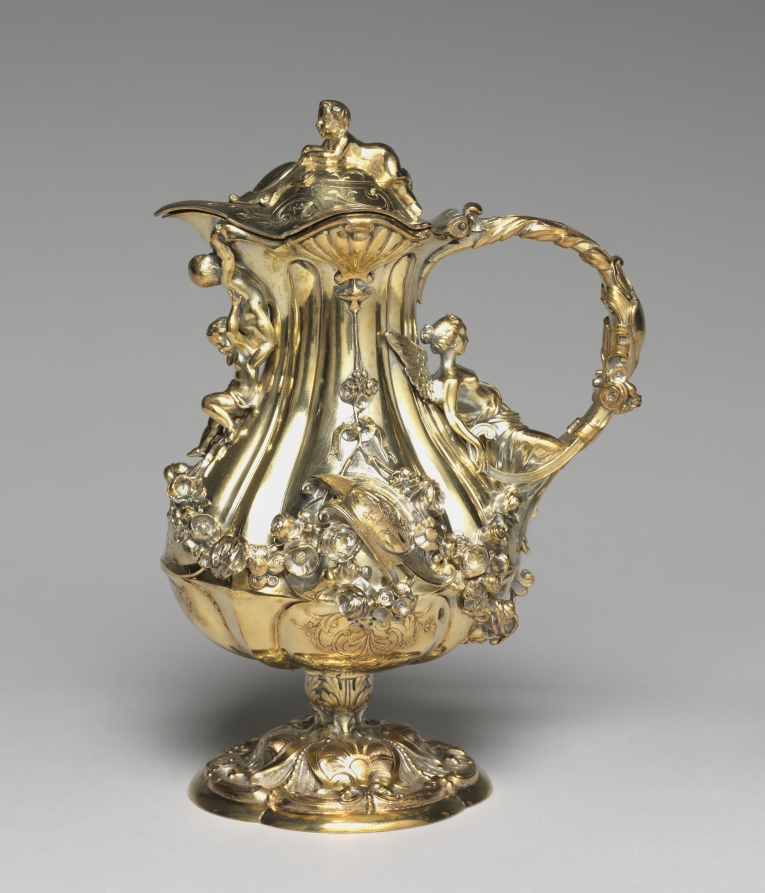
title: Covered Jug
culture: France, 19th century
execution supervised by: Jean-Valentin Morel (French, 1794–1860)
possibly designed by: Jules Dieterle (French, 1811–1889)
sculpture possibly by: Jules Klagmann (French, 1810–1867)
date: c. 1845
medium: gilded silver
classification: Silver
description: The elegance and richness of this ewer demonstrate the high level of technical mastery achieved by its maker. Morel studied under his father, a Parisian lapidary (someone who cuts, polishes, and engraves hard stones), and with Adrien Vachette, a maker of gold boxes. In 1842 he went into partnership with Charles-Edmond Duponchel, which lasted until the late 1840s, at which time he established himself in London, remaining there until 1852, when he returned to Paris. Morel frequentlyfollowed the designs of others, and it has been suggested that in the case of this pitcher his well-known contemporary, Jules Dieterle (1811-1889), may have conceived the overall form. The female figure seems to have been based on a design by the sculptor Jules Klagmann (1810-1867).